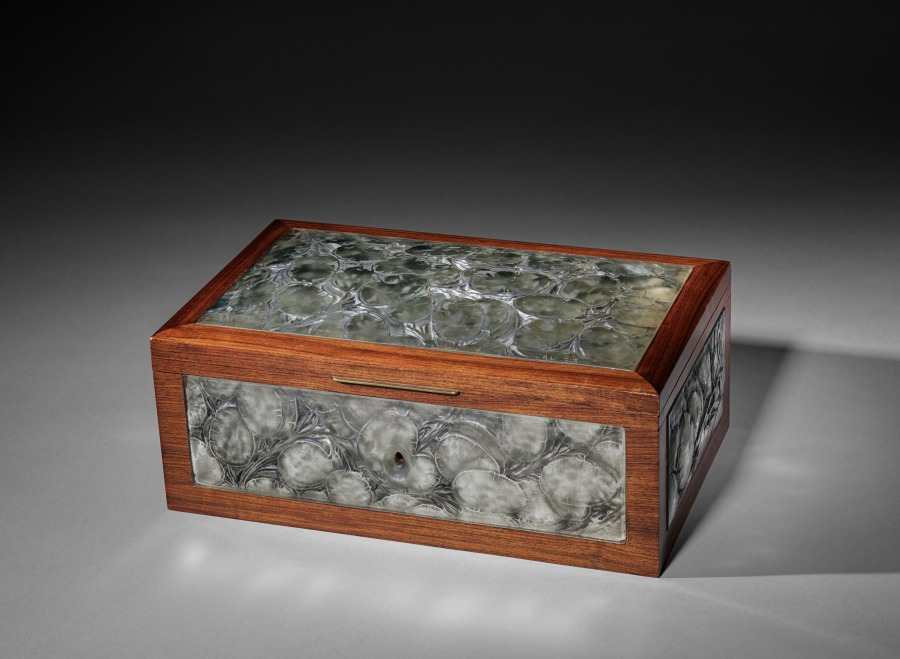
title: Monnaie du Pape Coffer (coffret)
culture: France, 20th century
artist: René Lalique (French, 1860–1945)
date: c. 1914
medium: wood, bombé glass panels with gray patina, metal key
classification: Mixed Media